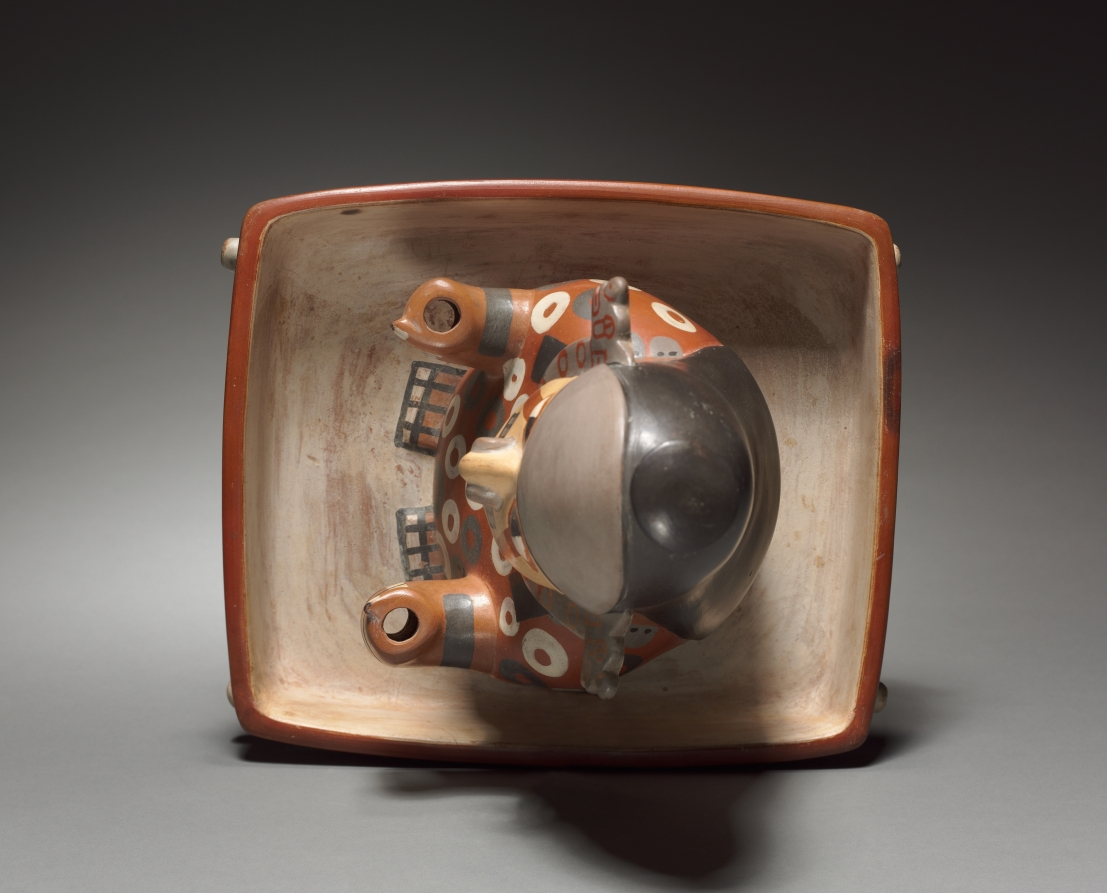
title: Figure in a Litter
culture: Wari (Pachacamac) style, Middle Horizon, Epoch 2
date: 500–900 (Thermoluminescence date, 590–1090)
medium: earthenware with colored slips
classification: Ceramic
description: Whether a deity, ancestral mummy, or masked human, this figure signals power. The divided eyes and fangs are traits of supernatural beings. The hands are cupped around holes that once perhaps held staffs, symbols of human and divine authority. And the litter was a mode of travel reserved for those of high station; the knobs refer to poles that rested on the shoulders of human bearers.